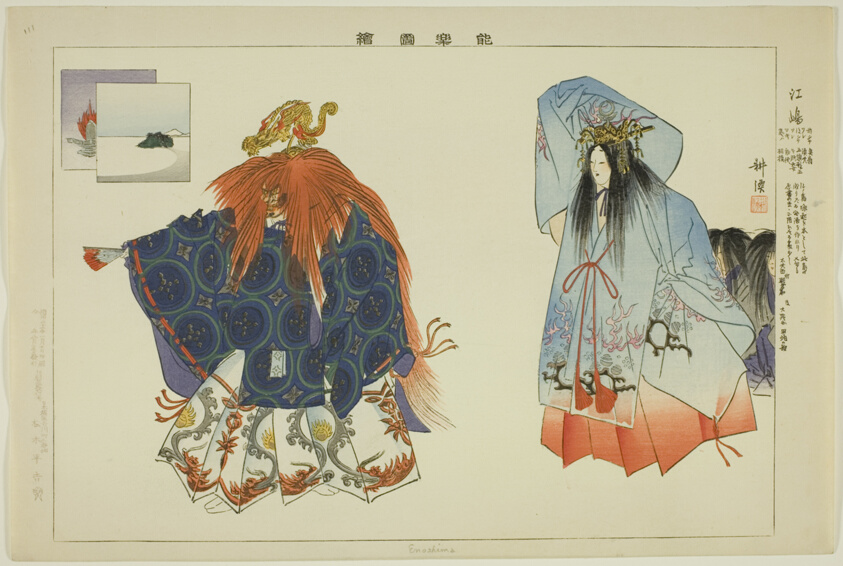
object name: Print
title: Enoshima, from the series "Pictures of No Performances (Nogaku Zue)"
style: Japanese (culture or style)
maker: Tsukioka Kogyo; Japanese, 1869-1927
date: 1898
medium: Color woodblock print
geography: Japan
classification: woodblock print; print; asian art